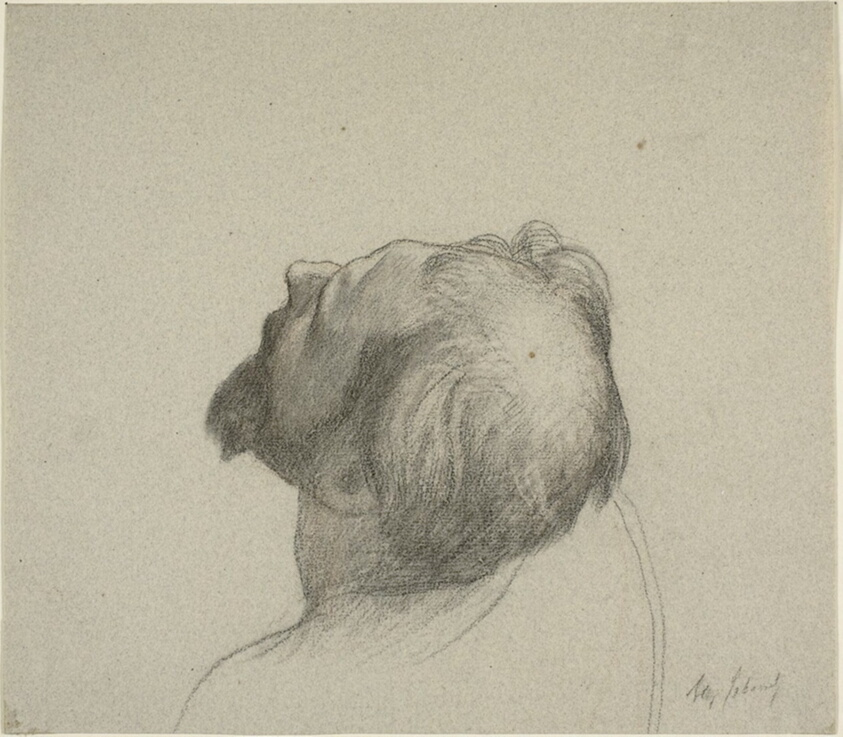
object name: Drawing and Watercolor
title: Study of Man's Upturned Head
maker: Alexandre Cabanel (French, 1823-1889)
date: c. 1878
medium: Black and red chalk on gray laid paper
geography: France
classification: chalk; drawings (visual works); prints and drawing